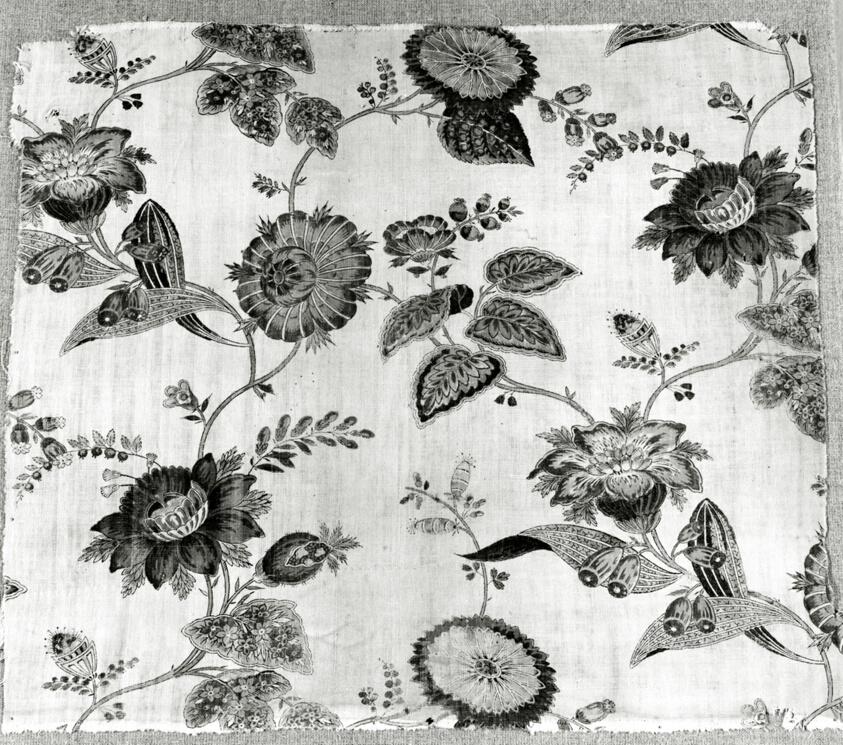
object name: Textile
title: Fragment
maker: France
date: 18th century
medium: Cotton, plain weave; block printed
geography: France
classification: textile; weaving - printed; weaving